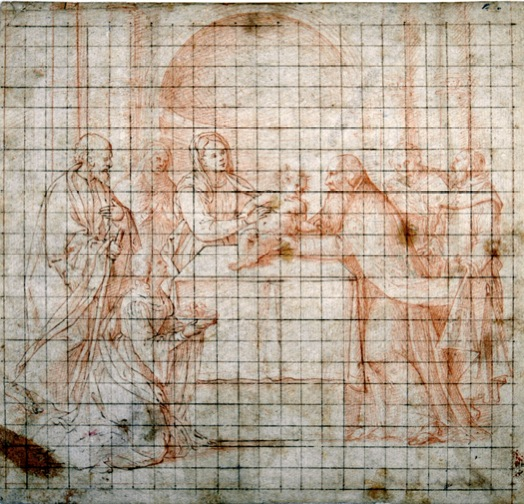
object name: Drawing and Watercolor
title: The Presentation in the Temple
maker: Girolamo da Santacroce (Italian, 1480/85–1556)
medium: Red chalk, with pen and brown ink and traces of black chalk, on cream laid paper, squared in pen and brown ink and ruled along the perimeter in red chalk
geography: Italy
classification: drawings (visual works); paper; prints and drawing